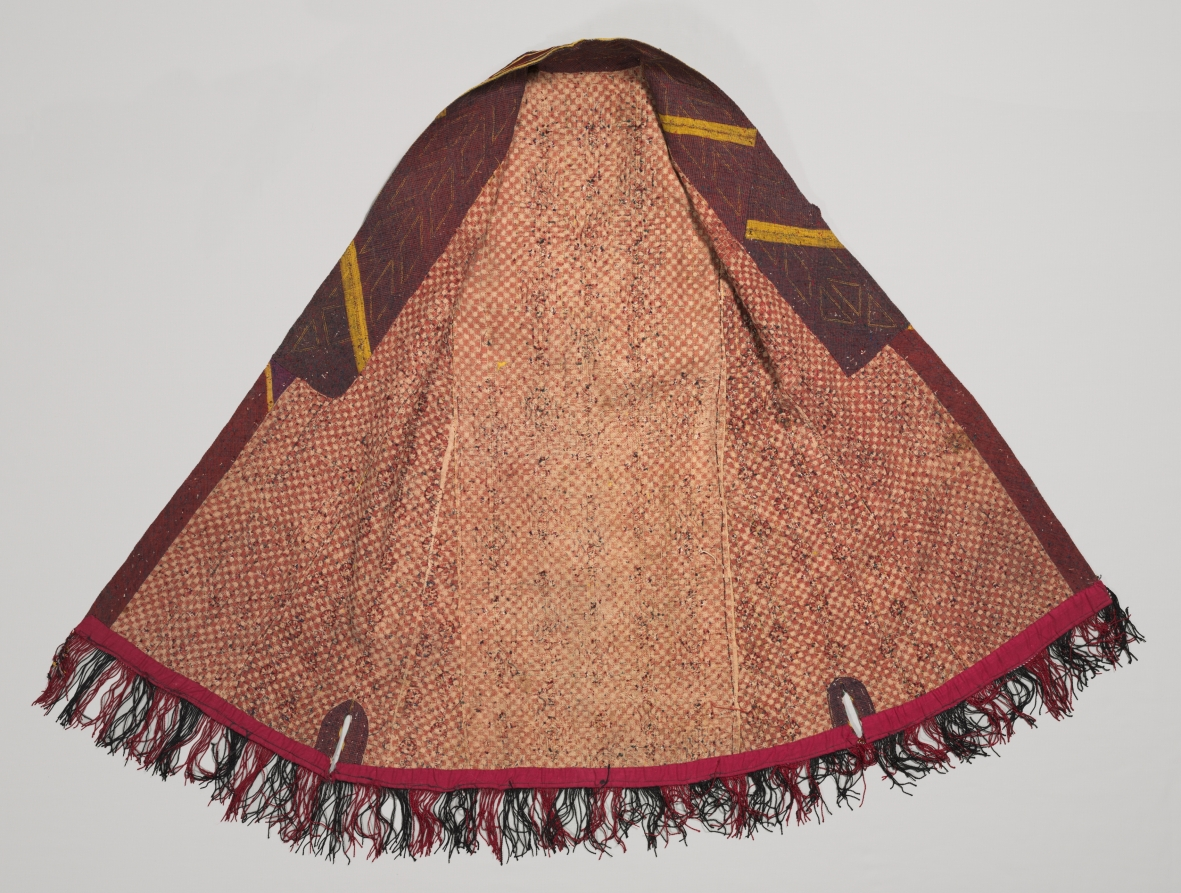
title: Woman’s Mantle (Chyrpy)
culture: Central Asia, Turkmenistan, Tekke tribe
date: late 1800s–early 1900s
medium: Exterior: silk; plain weave; embroidery: chain stitch; Trim: silk; tablet-woven with fringe; Lining: cotton; plain weave, block printed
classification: Garment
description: Traditional costumes in central Asia have distinctive characteristics that indicate ethnicity, age, and class. One of the oldest examples is a woman’s coat with false sleeves attached on the back and worn over the head. This silk coat in yellow, the color worn by middle-aged women, is elaborately decorated with popular stylized tulips embroidered in chain stitch. Worn consistently by a newlywed, the coat was later only used on special occasions. Although women made and embroidered garments at home, this expensive luxury mantle was professionally made and sold in the marketplace.